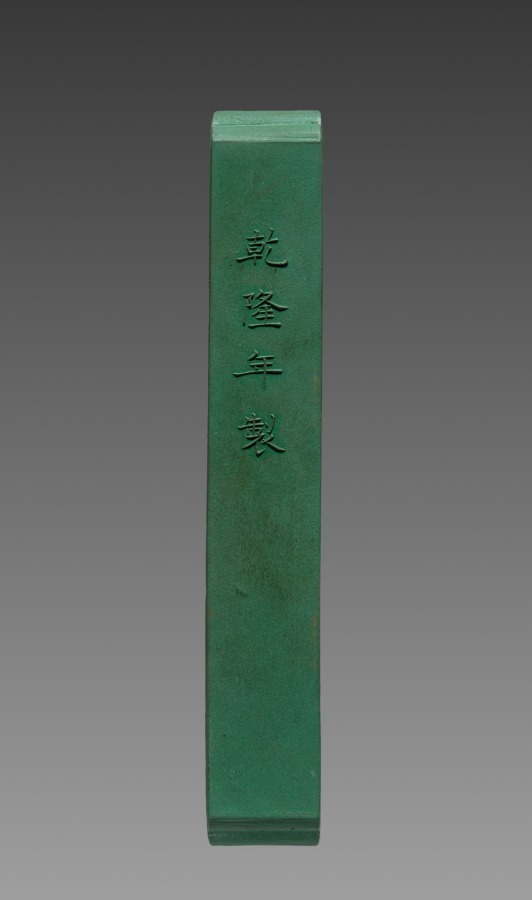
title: Ink Stick from an Imperially Commissioned Set of Ink Stick with Images and Poems of Famous West Lake Sites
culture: China, Qing dynasty (1644–1911), Qianlong reign (1736–95)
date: 1780–94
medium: Molded ink in green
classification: Miscellaneous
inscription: 乾隆年製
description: This is one of ten ink cakes of different shapes and colors stored in an exquisite lacquer box. Each is inscribed in gold with a poem by the Qianlong emperor, praising the ten famous sights of the Westlake in Hangzhou, near Shanghai. The Westlake is famous for its natural beauty; it was a favorite imperial destination and remains a tourist attraction today. Ink cakes (also called ink sticks) are dissolved with the addition of water and ground on the surface of a flat stone into liquid ink for painting and calligraphy. The precious ink cakes here, however, have never been used.